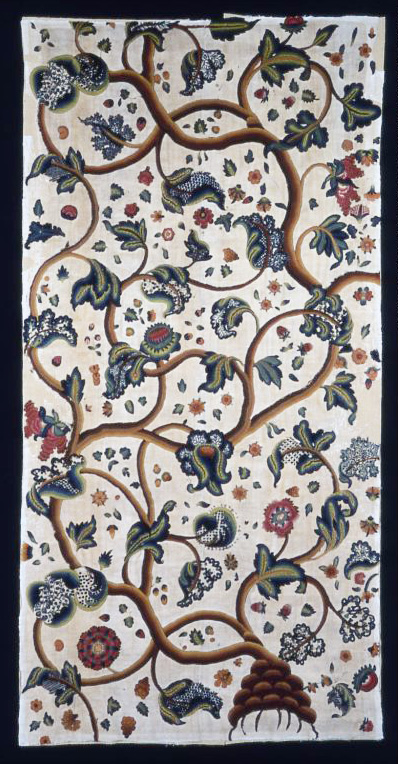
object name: Textile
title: Panel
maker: England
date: 1675/1700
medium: Cotton and linen, weft float-faced 2:1 twill weave; embroidered with wool and silk in back, bullion, buttonhole, chain, detached chain, coral, satin, single satin, and stem stitches; laid work, couching, and French knots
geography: England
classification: textile; needlework (visual works)